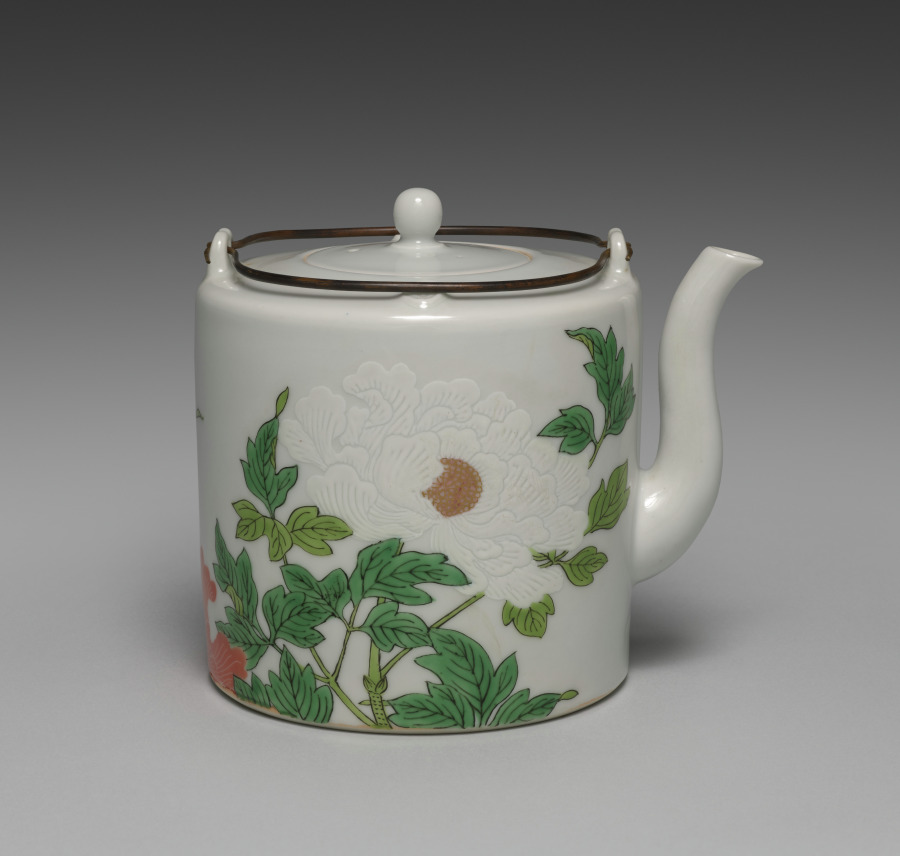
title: Sake Pourer with Flowers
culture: Japan, Meiji period (1868–1912)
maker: Seifū Yohei III (Japanese, 1851–1914)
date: 1893–1914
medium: Porcelain with molded design, overglaze color enamel, and metal handles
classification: Ceramic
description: This sake pourer is of a type called a chōshi. It is elaborately decorated with flowers in overglaze enamels in several colors, including black for the contour lines of leaves and stems; orange, white, gold, and two shades of green for the peonies; and purple for the thistles. The white blossoms have been built up with white enamel, then incised for a white-on-white eect; the orange and purple use an absence of color to produce the contours of individual petals. Yohei III referred to his works in multicolor overglaze enamels as “hundred flower brocades” (hyakka nishiki). Two small nyoi (C. ruyi) staff-head motifs, molded in clay and applied to either side of the lid, create handle rests, as well as natural places for the thumb and index finger of one hand to rest, so one can both secure the lid and steady the pour, while the handles are held in the other hand. The top of a nyoi staff resembles the curled cap of the reishi. Such scepters are imagined to be found in the hands of sages, Daoist immortals, or Buddhist deities and connote lofty goings-on and favorable circumstances. Since this sake pourer is unsigned, it may have been made for imperial family members to give as a gift.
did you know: This sake pourer with purple thistles and orange peonies shows off Seifū Yohei III’s technique of enamels painted over the glaze.